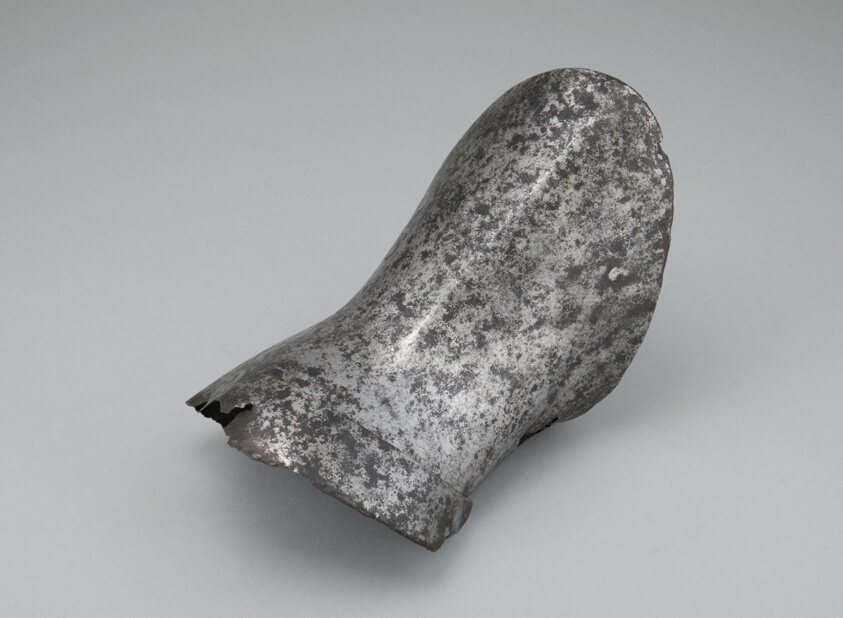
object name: Armor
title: Gauntlet for the Left Hand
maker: Italian, Milan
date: c. 1450/60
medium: Steel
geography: Milan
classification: suit-gauntlet; armor; arms and armor